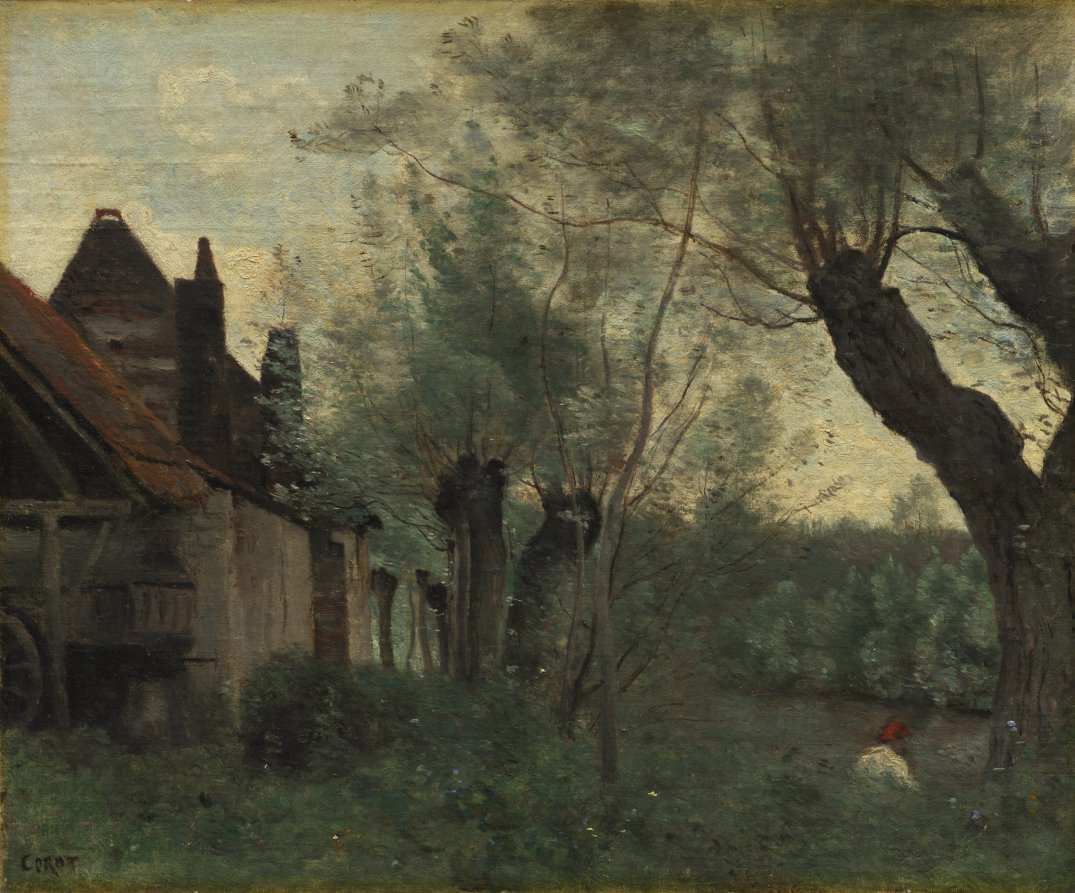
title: Willows and Farmhouse at Sainte-Catherine-lès-Arras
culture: France, 19th century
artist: Jean Baptiste Camille Corot (French, 1796–1875)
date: 1871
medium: oil on fabric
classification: Painting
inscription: Signed lower left: corot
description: With its quiet water and sky, fluffy trees, and other foliage flecked with light, this picture exemplifies the style that won Corot success with a wide public. It was painted during the artist's stay at Arras (about 100 miles north of Paris) in 1871.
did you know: Corot began his career as a draper and his exposure to the colors and textures of fabrics helped him develop an astute aesthetic sense.